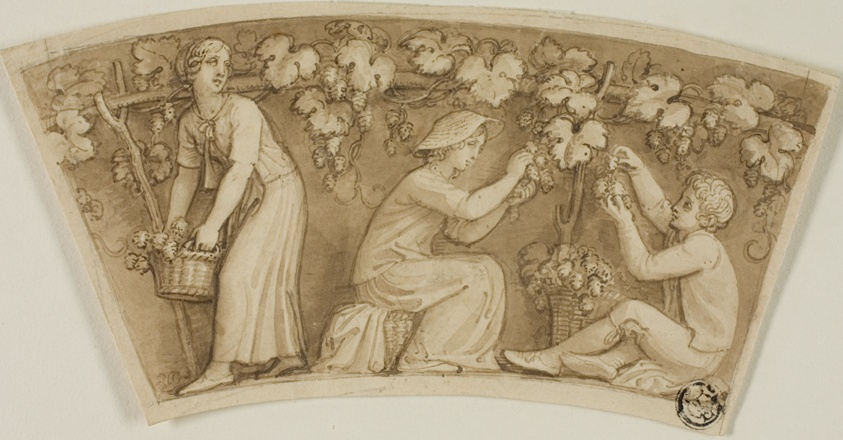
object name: Drawing and Watercolor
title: The Hop Gatherers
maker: Thomas Stothard (English, 1755-1834)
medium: Pen and brown ink with brush and brown wash, on cream wove paper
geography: England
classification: ink or chalk wash; drawings (visual works); prints and drawing